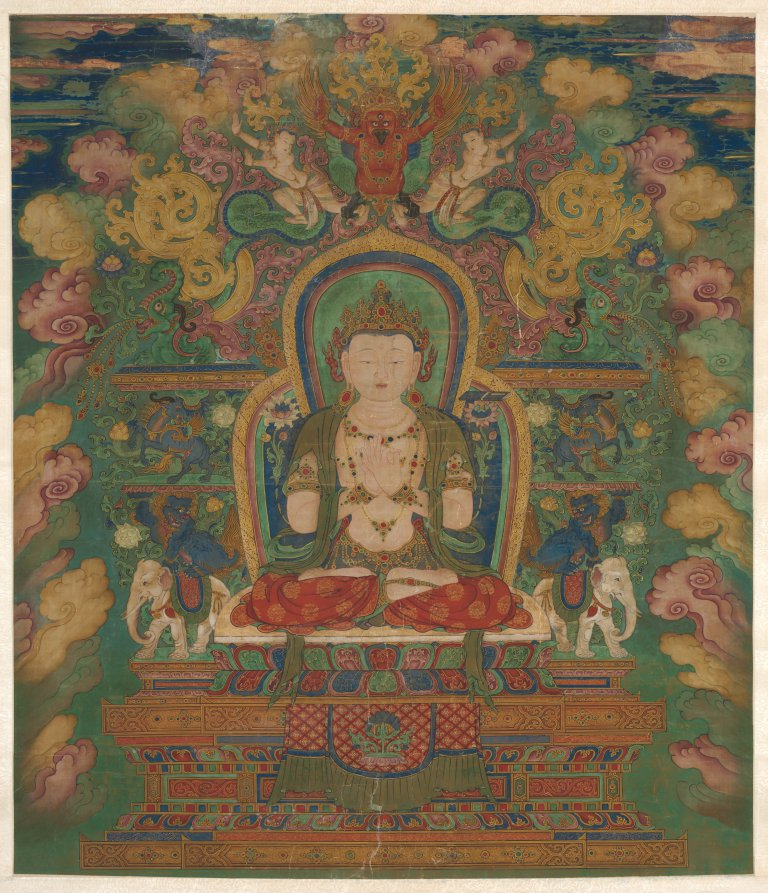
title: Manjushri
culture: China, Ming dynasty (1368–1644)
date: c. 1500–1550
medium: Hanging scroll, ink, color and gold on silk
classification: Painting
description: A Chinese artist's interpretation of an Indo-Nepalese throne surrounds the white figure of Manjushri, the bodhisattva of wisdom. Chinese textiles and jewels drape fluidly over the body, the red lower garment offering a contrast to the abundance of malachite green that dominates the composition. Swirling clouds of variegated hues around the periphery add to the mystical, almost magical mood of this iconic figure. His hands are in the gesture of imparting the Buddhist teachings, while his posture and expression reveal that wisdom can be perceived through the practice of yogic meditation.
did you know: The book on the lotus by the figure's left shoulder identifies him as Manjushri, the bodhisattva of wisdom.